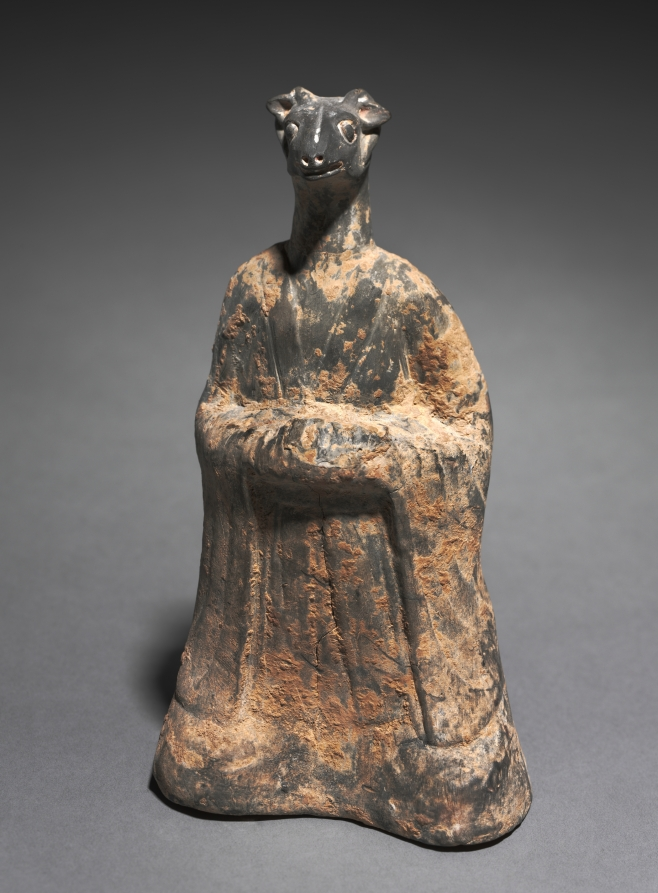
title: Mortuary Figure of the Zodiac Sign: Sheep (Scorpio)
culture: China, Northern Wei dynasty (386-534)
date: 500s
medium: gray earthenware with traces of slip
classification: Sculpture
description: The twelve-animal zodiac series—rat, ox, tiger, rabbit, dragon, snake, horse, goat, monkey, rooster, dog, and boar—signifies a traditional Chinese concept of time structured in a cyclical order. The twelve animals are also linked to the art of fortune-telling that underlies human existence in connection with the changes of the universe. The use of the twelve zodiac animals as tomb furniture suggests they provided a cosmological structure for the afterlife.